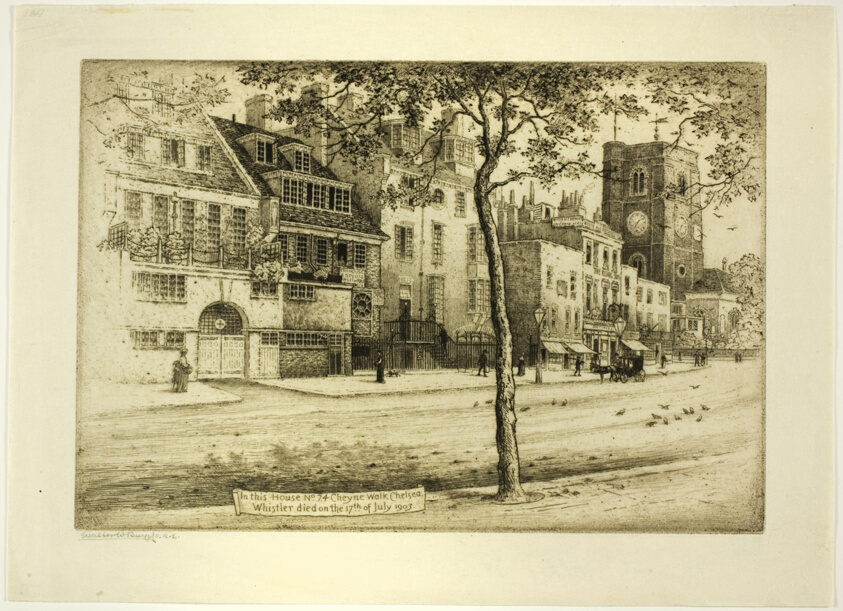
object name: Print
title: Cheyne Walk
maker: Walter William Burgess (English, 1856-1908)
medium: Etching, with aquatint, in black on cream wove paper Broad margins all around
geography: England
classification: etching; print; prints and drawing